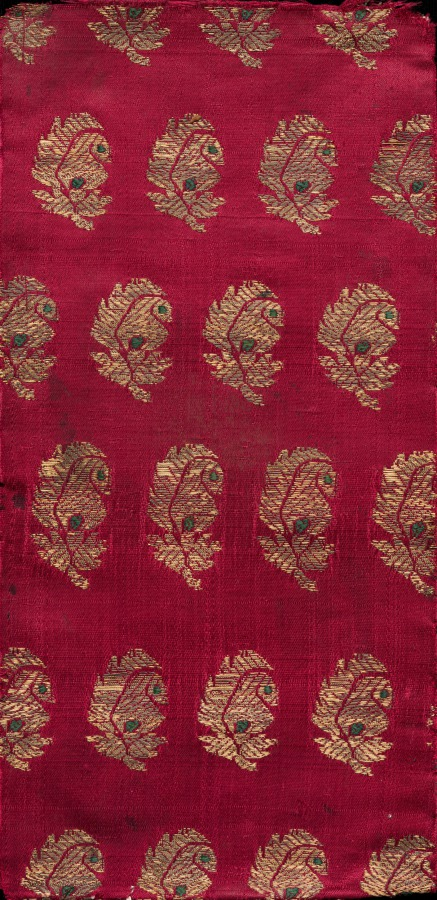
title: Brocaded Book Cover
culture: India, 19th century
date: 1800s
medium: brocade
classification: Textile